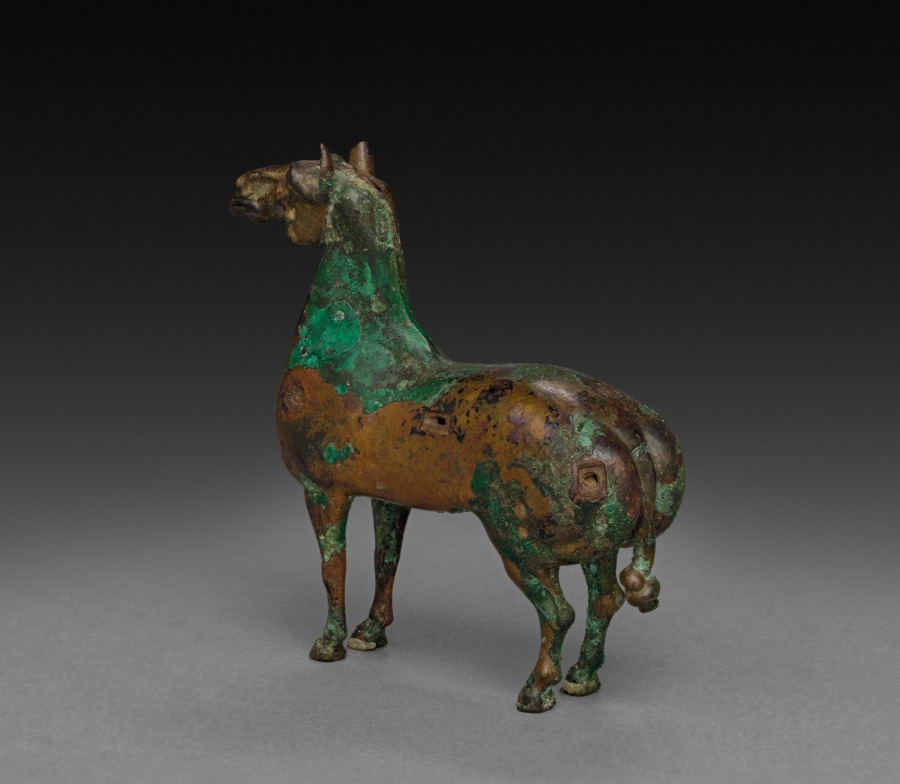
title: Standing Horse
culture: China, Han dynasty (202 BCE–220 CE)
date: 206 BCE–220 CE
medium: bronze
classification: Sculpture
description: The fine steed has indentations on both sides of its body, indicating that it was once harnessed and pulled a carriage. Substituting a real horse, it accompanied a tomb occupant into the afterlife.